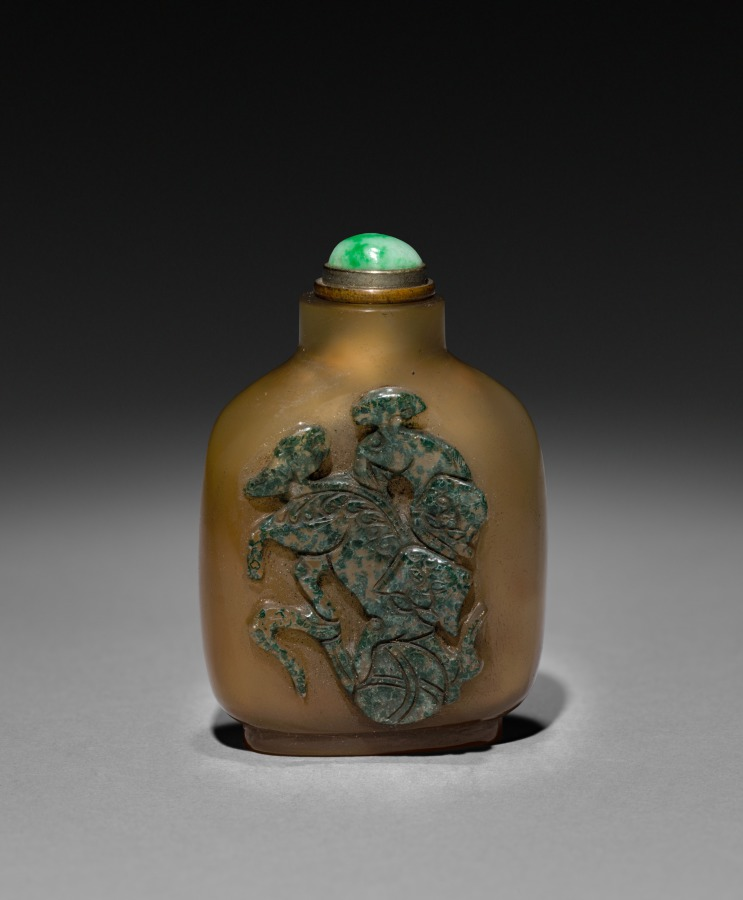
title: Snuff Bottle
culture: China, Qing dynasty (1644-1911)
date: 1644–1911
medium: glass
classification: Glass